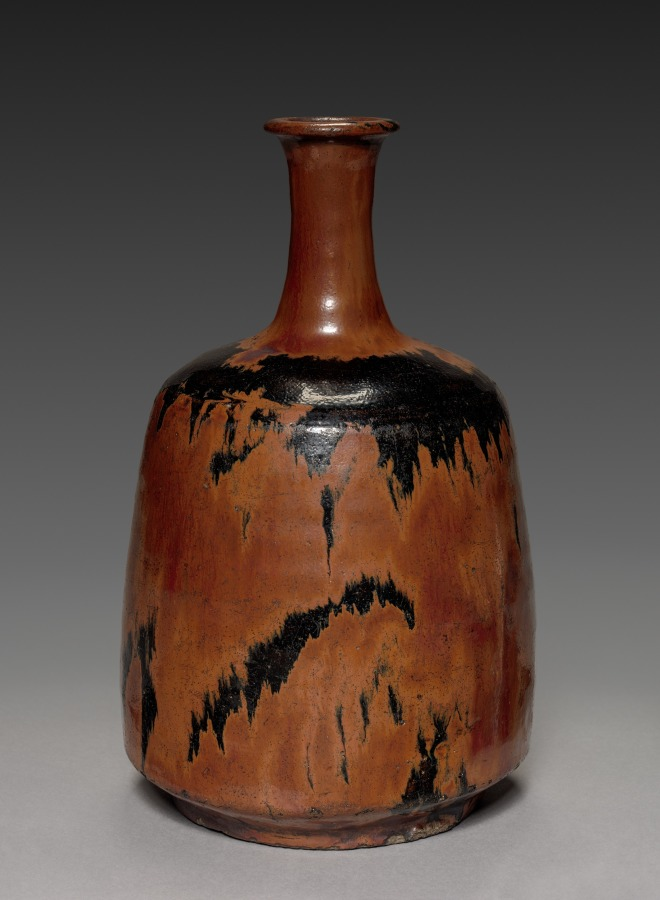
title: Bottle Vase: Seto Ware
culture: Japan, Momoyama period (1573-1615) to Edo period (1615-1858)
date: 1600–1650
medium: slip glazed stoneware (Mino or Seto ware)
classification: Ceramic